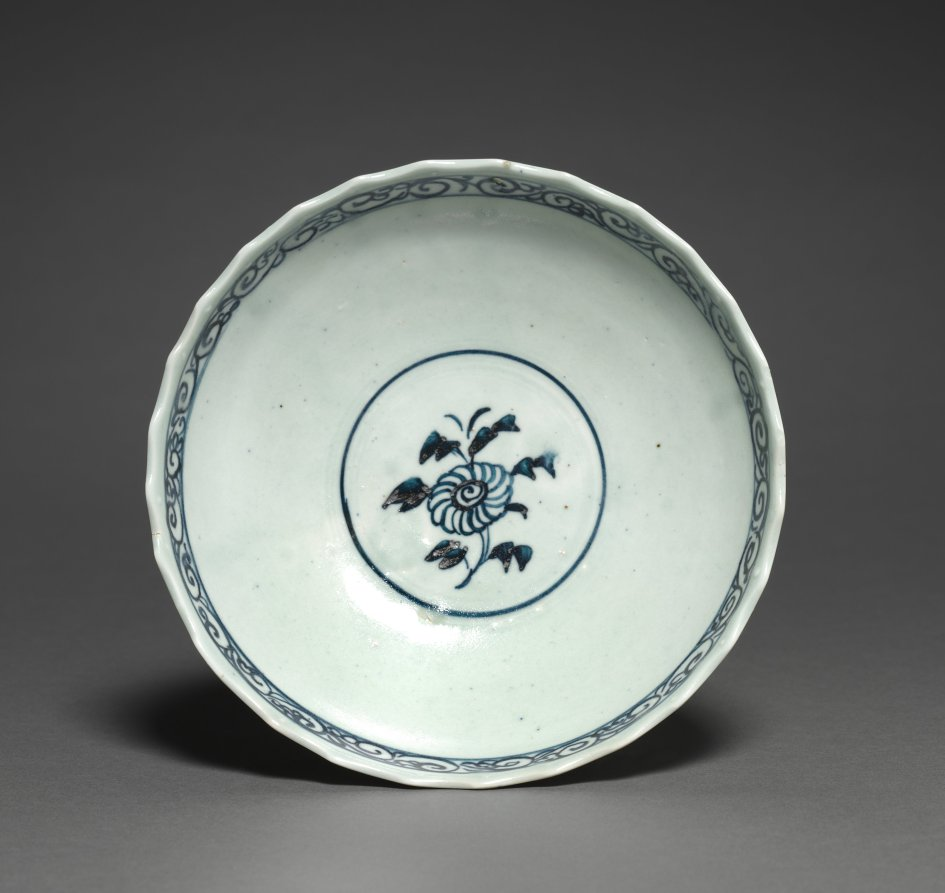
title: Stem Cup with Dragon Decoration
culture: Vietnam (Annam)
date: 1300s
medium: porcelain with underglaze blue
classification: Ceramic